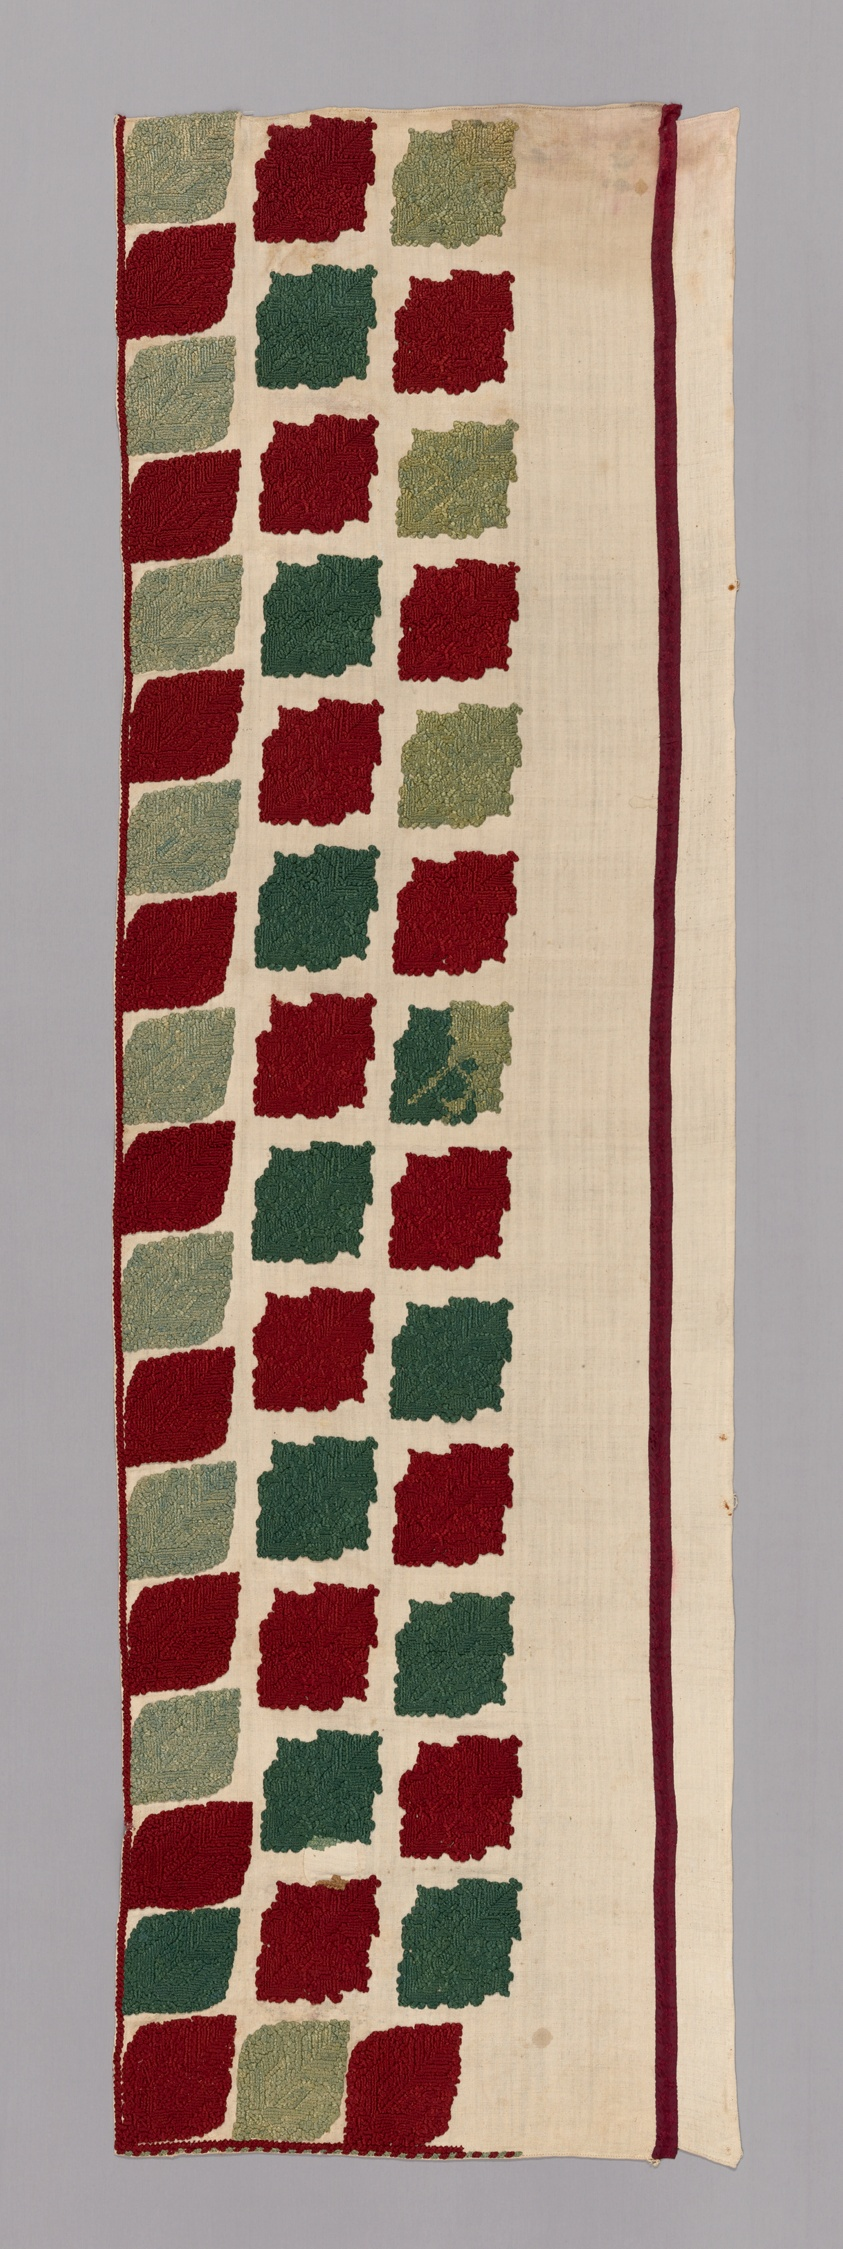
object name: Textile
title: Valance (For a Bed)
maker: Rhodes, Dodecanese Islands, Greece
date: 17th/18th century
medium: Linen, plain weave; embroidered with silk in cross, four-sided, running, and padded satin stitches; inset of silk and cotton, warp-float faced satin weave self-patterned by ground weft floats and areas of twill interlacing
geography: Ródhos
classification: textile; needlework (visual works)